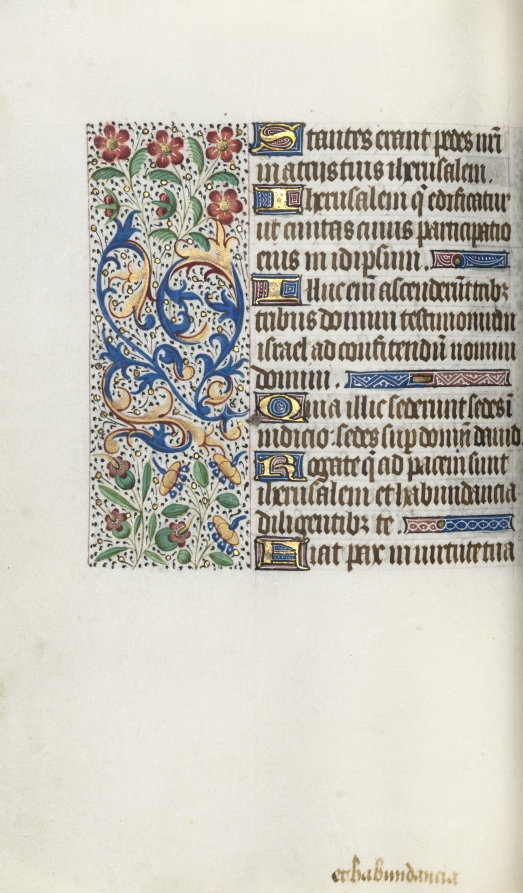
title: Book of Hours (Use of Rouen): fol. 62v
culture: France, Rouen, 15th century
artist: Master of the Geneva Latini (French, active Rouen, 1460–80)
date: c. 1470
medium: ink, tempera, and gold on vellum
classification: Bound Volume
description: In the late 1400s and early 1500s Rouen was an established and important center of book production. The city’s cathedral had a wealthy chapter that spent large sums of money to commission books and to maintain its extensive library. The stationers and booksellers would have likely been concentrated in or near the cathedral precinct. This artist, named after a manuscript now in Geneva, was Rouen’s principal illuminator during the second half of the 1400s.